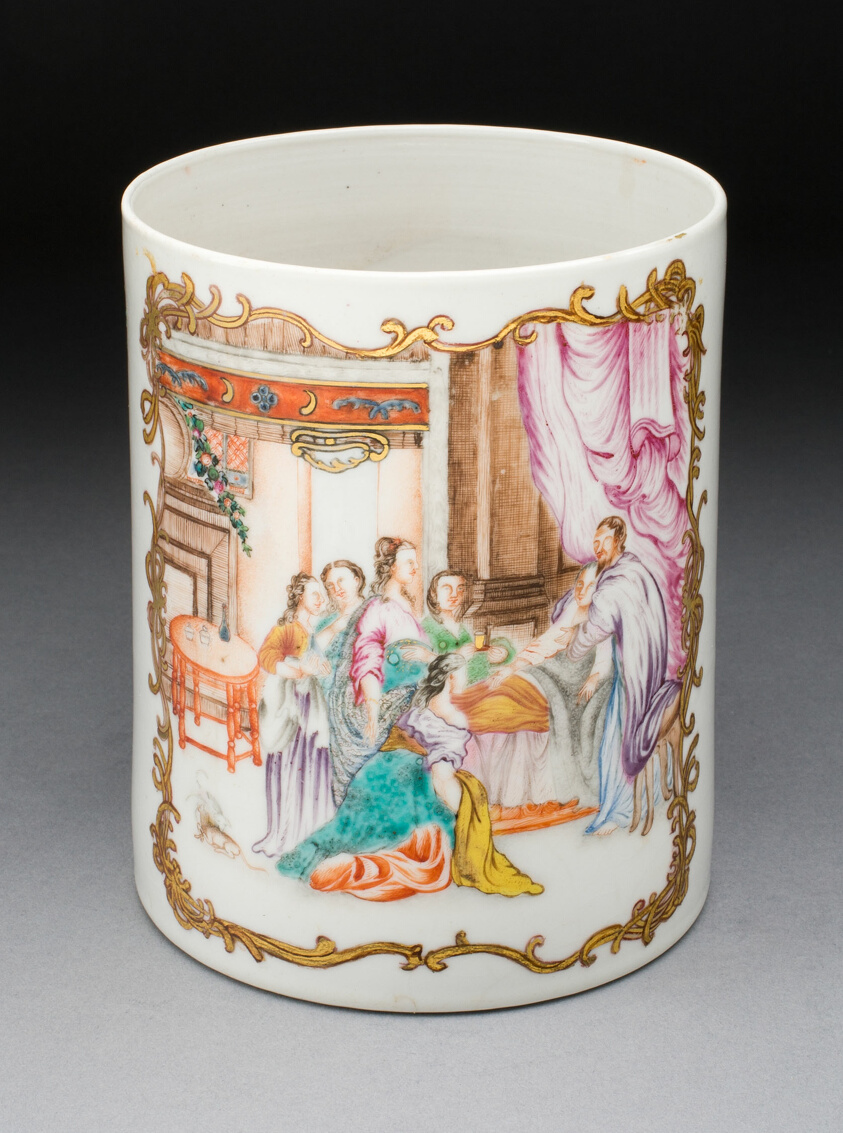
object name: Ceramics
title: Tankard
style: chinese export, Chinese (culture or style), East Asian, asian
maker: China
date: 1750/75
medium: Hard-paste porcelain with polychrome enamels and gilding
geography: Jingdezhen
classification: drinking vessel; chinese export porcelain; porcelain; european decorative arts; ceramics